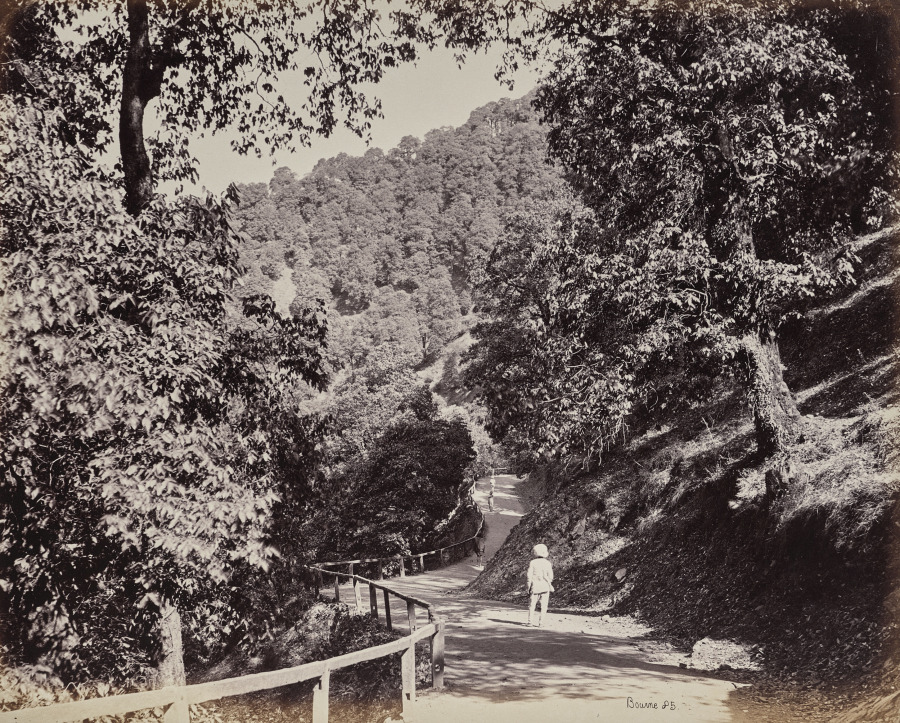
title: Shimla. The Mall near Rabq Lodge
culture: England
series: Photographs of Northern India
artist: Samuel Bourne (British, 1834–1912)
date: 1863–70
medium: albumen print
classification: Photograph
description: The 50 images in this album, all taken in the 1860s, move from the hill towns of the Himalayas down to cities including Lahore (now in Pakistan), Delhi, Lucknow, Agra, Benares (now Varansi), and Calcutta (now Kolkata). Architectural studies of major monuments offer valuable historical records of what sites such as the Taj Mahal and the imperial mosque of the Mughal emperors in Delhi looked like before 20th-century restorations.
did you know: Samuel Bourne, the author of most the images in this album, was a banker in England before he moved to India to become a professional photographer.